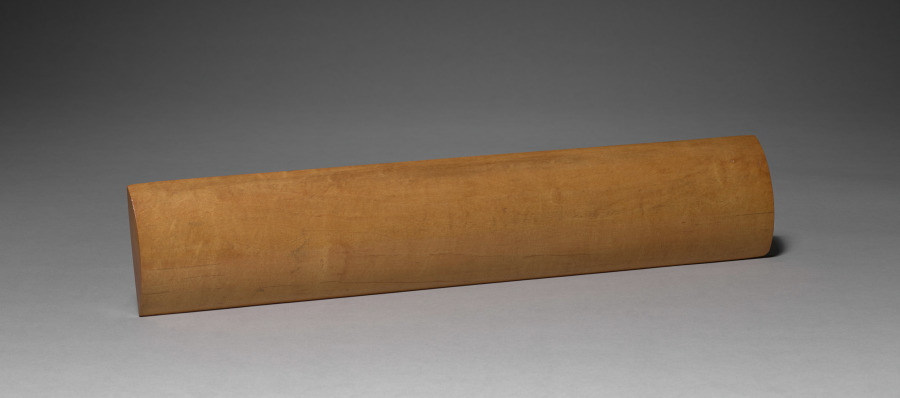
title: Train Car Coupler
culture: Denmark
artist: Boysen Toys (Danish)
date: 1900s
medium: wood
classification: Wood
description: Credit line: John D. Rockefeller General Education Board Grant II